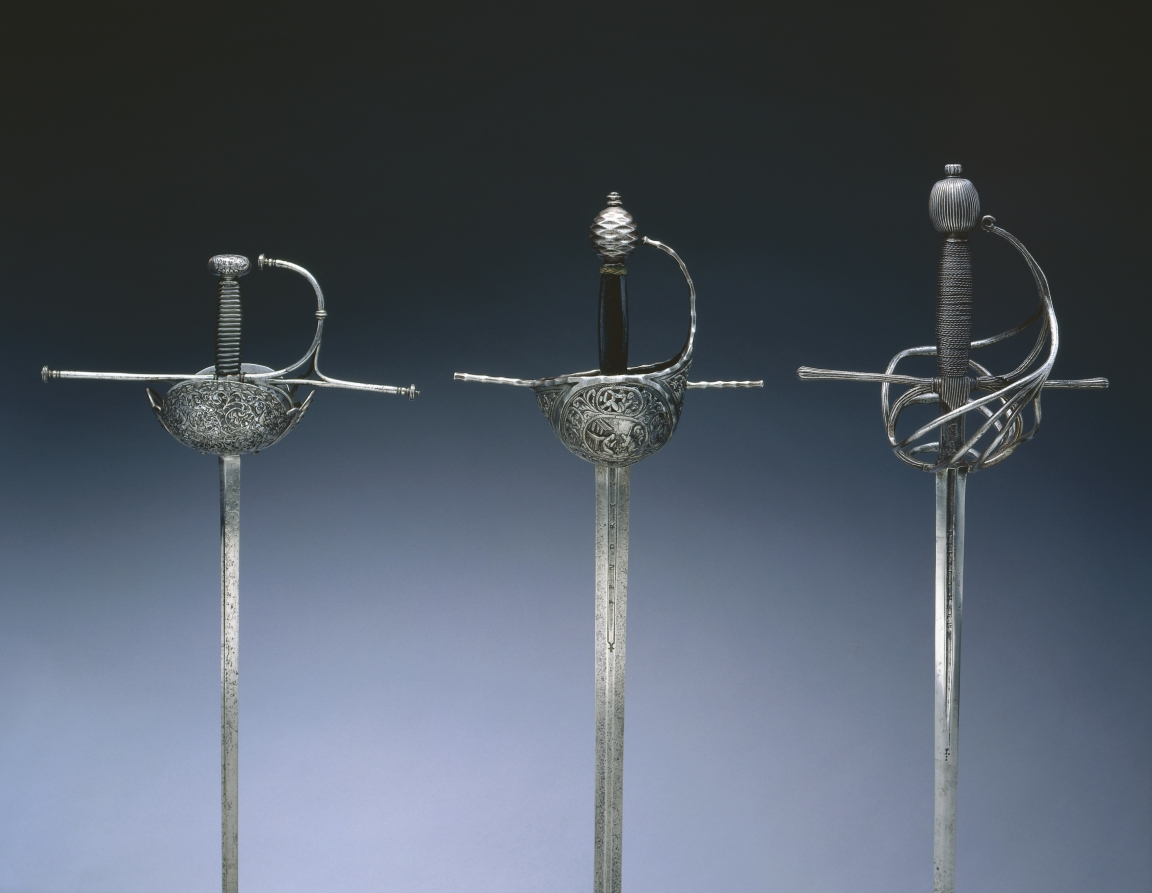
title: Rapier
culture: Blade: Spain, Toledo Hilt: Italt, Belluno?, late 16th-early 17th Century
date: c. 1580–1610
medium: steel, ribbed guard and pommel; wood and wire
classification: Arms and Armor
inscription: PIETRO HERNAN[DJEZ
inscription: three (Toledo and half-moon)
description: The rapier was a sword worn with civilian dress and used in duels. The term rapier derives from the 16th-century French word rapière, which in turn derived from the Spanish espada ropera, or “dress sword.” The rapier was a light weapon with a straight double-edged and pointed blade that, with the development of the art of fencing in the 1500s and 1600s, gradually became narrower and lighter, and thus suitable for thrusts only. With the new technique of swordplay emphasizing the point of the blade, sword guards became more complex to protect the duelist’s unarmored hand. These elaborate guards were frequently decorated by various techniques—chiseling, bluing, russeting, and damascening.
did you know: During this time fencing academies were already in existence in Milan, Venice, Verona, and Madrid, and the rules of fencing evolved with two styles dominating, the Spanish and the Italian.